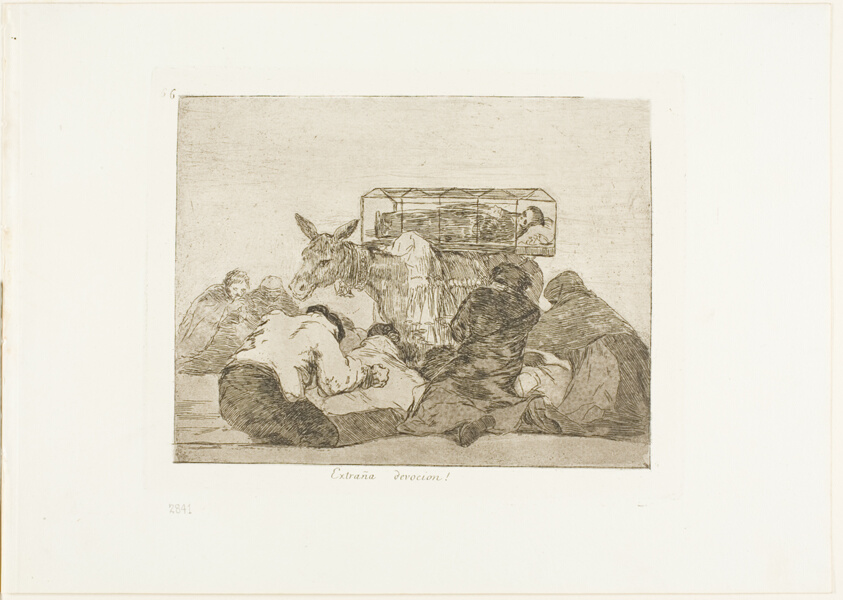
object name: Print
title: Strange Devotion!, plate 66 from The Disasters of War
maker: Francisco José de Goya y Lucientes (Spanish, 1746-1828)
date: 1815/20, published 1863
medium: Etching and burnished aquatint or lavis on ivory wove paper with gilt edges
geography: Spain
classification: etching; print; prints and drawing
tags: war